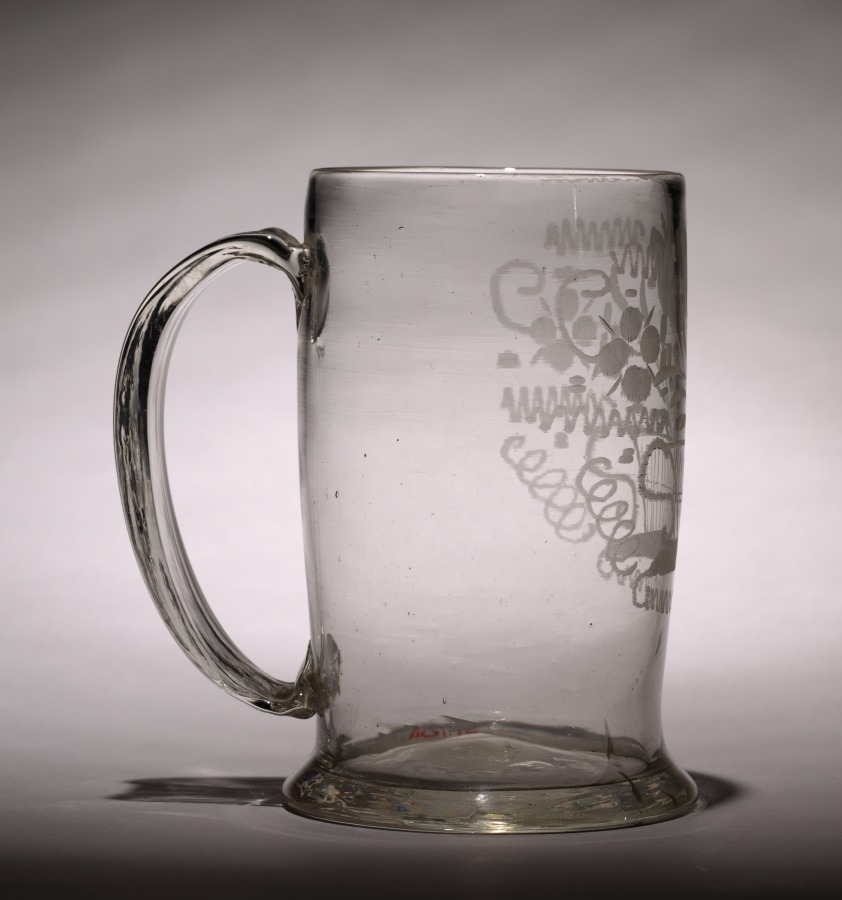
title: Handled Mug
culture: America, Stiegel Type, 18th century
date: 1700s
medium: glass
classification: Glass